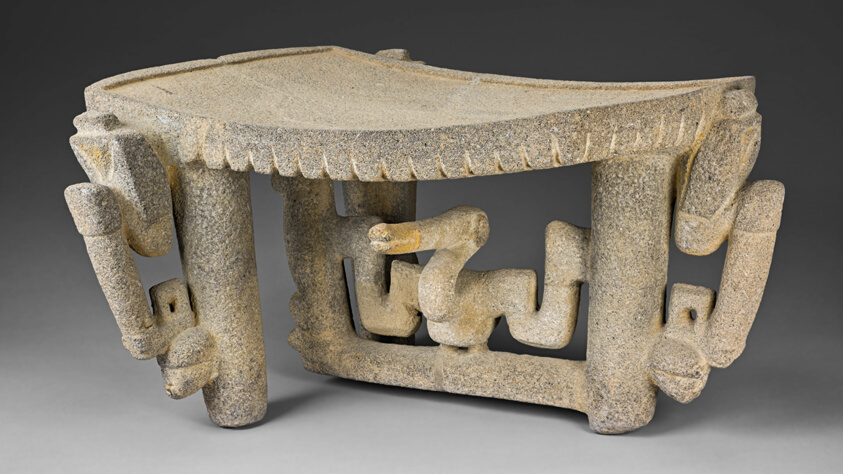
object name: Sculpture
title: Ceremonial Grinding Table (Metate)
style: nicoya, americas, lower central america, Arts of the Americas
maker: Nicoya (Nicoya, Guanacaste province, Costa Rica)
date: 1–500 CE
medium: Volcanic stone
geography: Nicoya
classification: stone; art of the americas; ceremonial object; metate; sculpture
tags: birds, animals, sacrifice